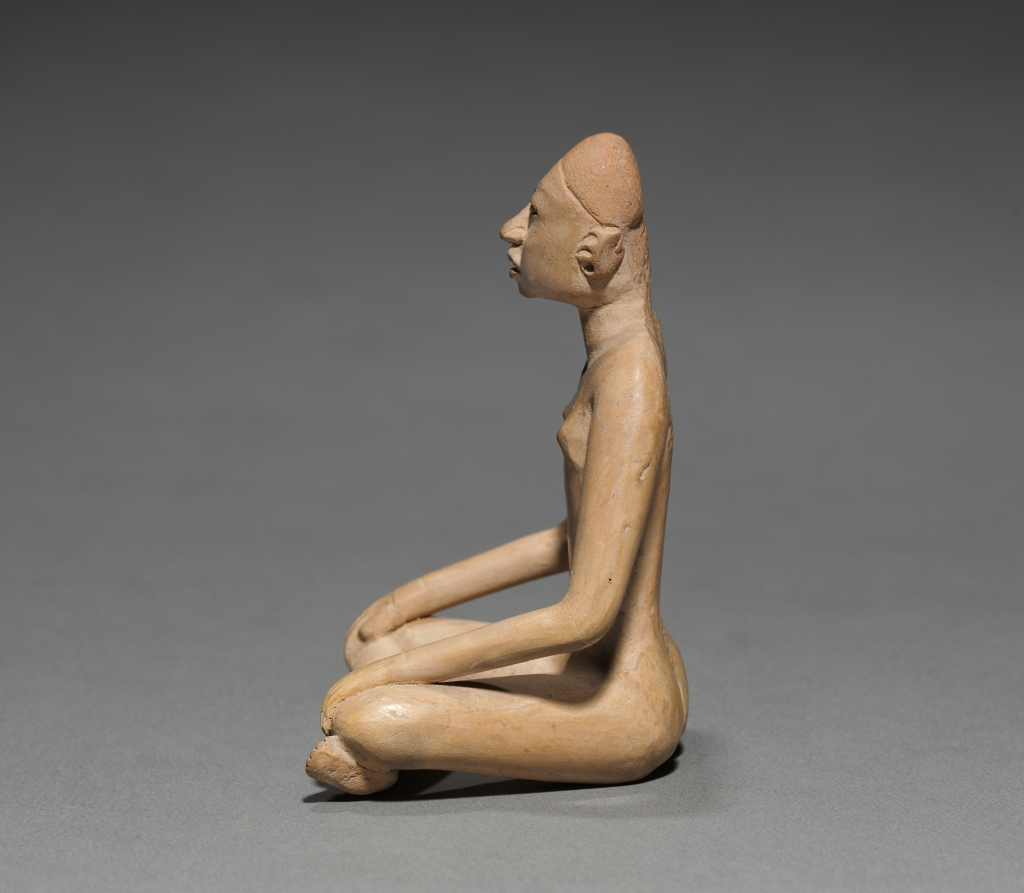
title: Seated Figurine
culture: Mexico, Gulf Coast, Huastec, Pánuco style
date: 1–700 CE (thermoluminescence date, 225–1055 CE)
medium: earthenware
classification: Sculpture